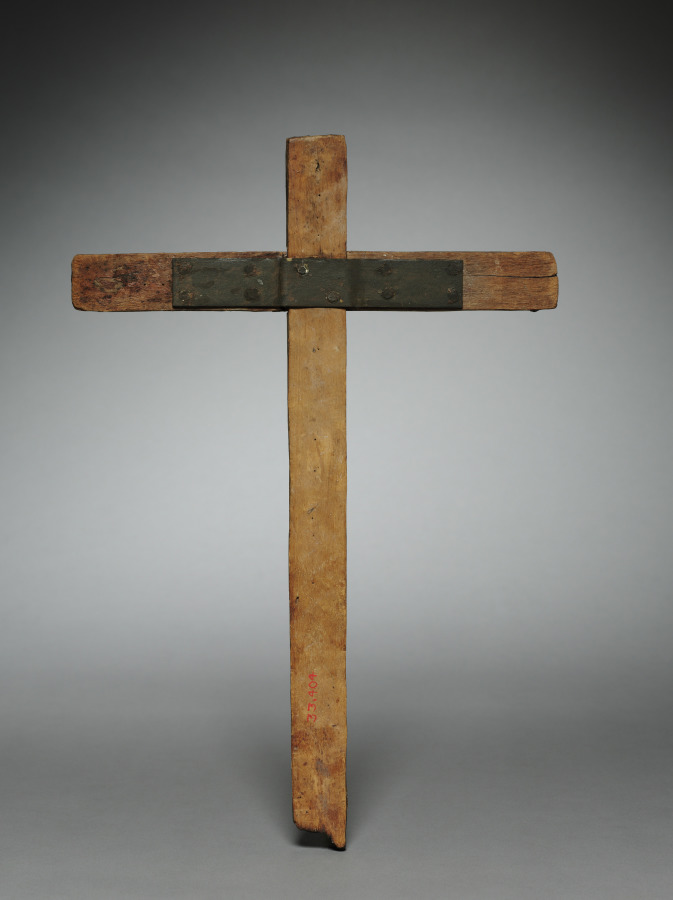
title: Straw Inlay Cross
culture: America, New Mexico, 17th-18th century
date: 1600s-1700s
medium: straw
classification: Miscellaneous